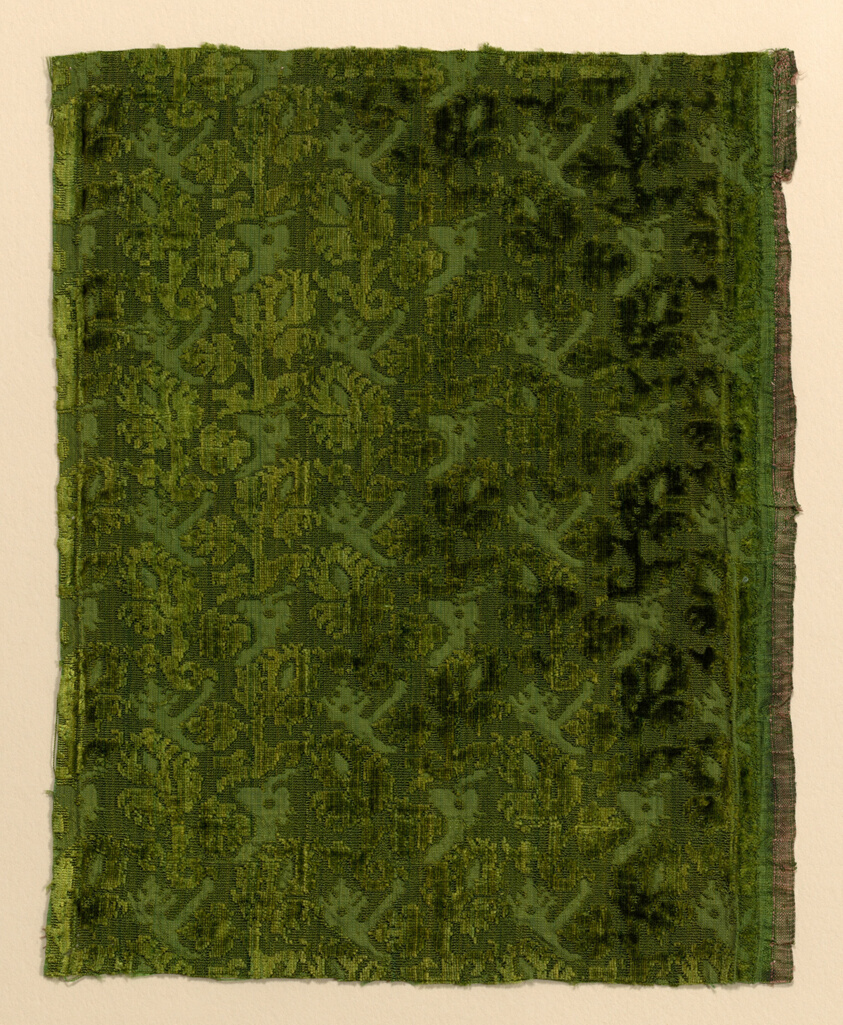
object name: Textile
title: Fragment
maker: Italy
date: 1600/50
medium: cisele voided cloth velvet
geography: Italy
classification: textile; weaving - velvet